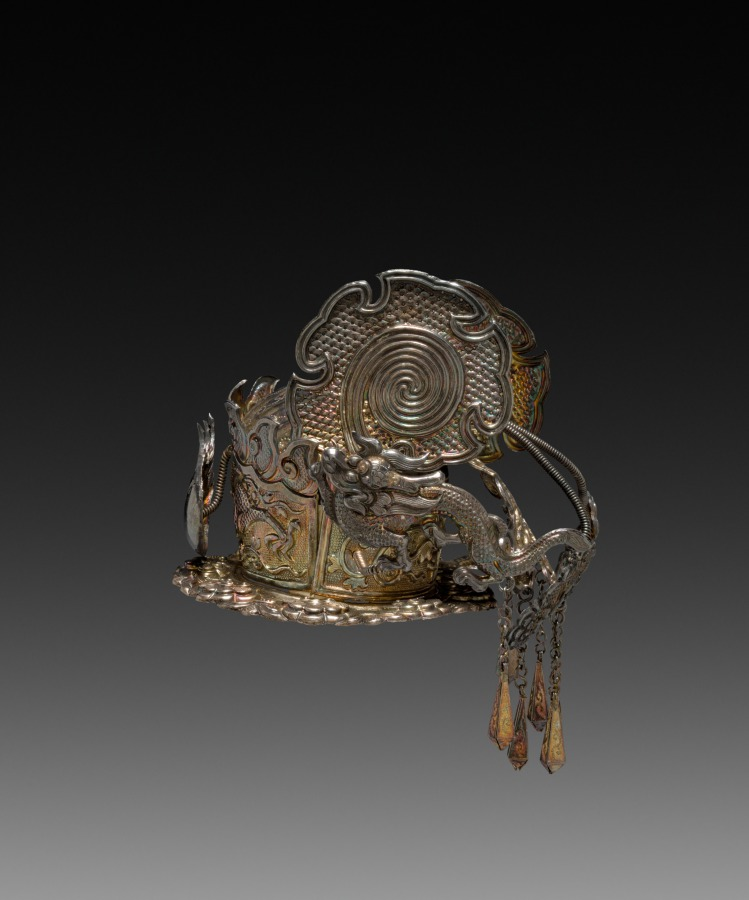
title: Model of a Hat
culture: China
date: early 1900s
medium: silver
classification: Metalwork